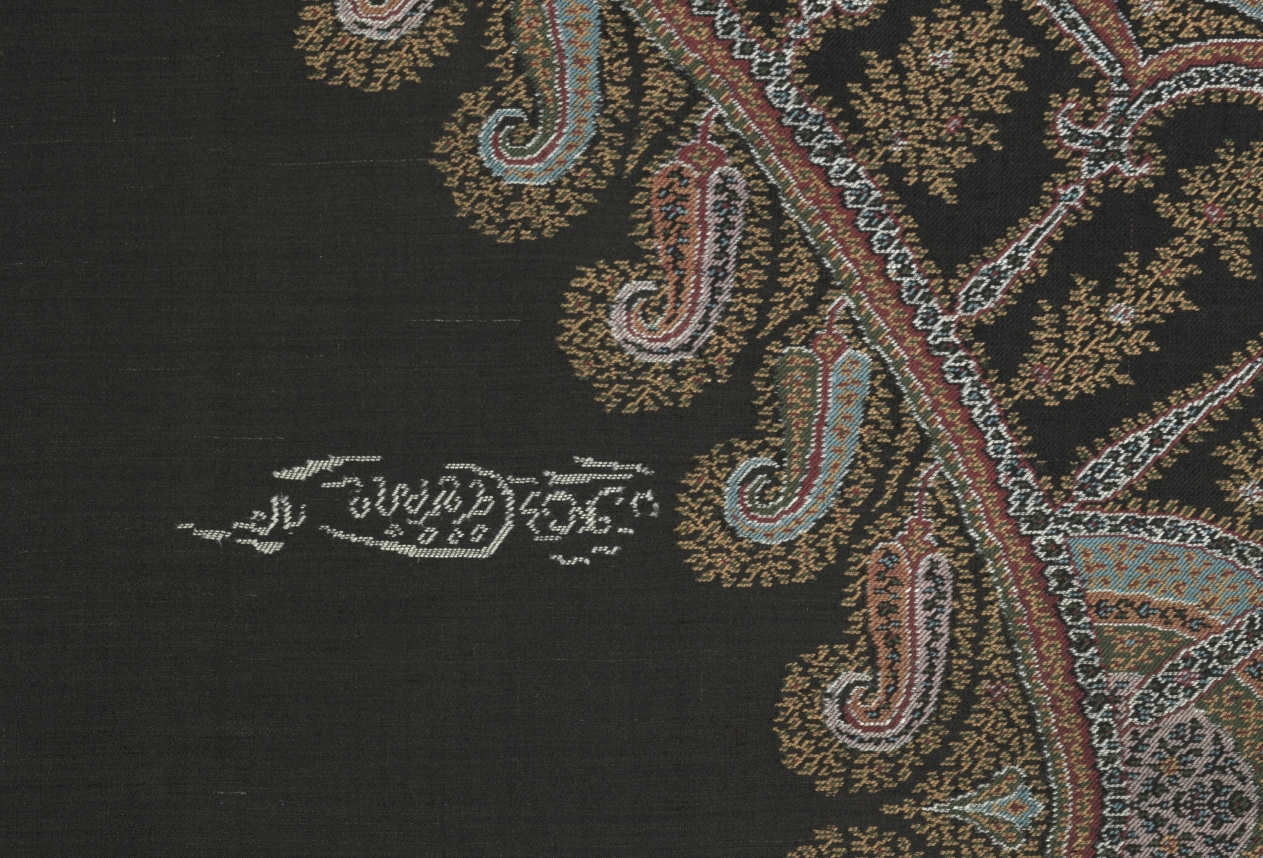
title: Long Shawl with Botehs, Black Center, and Lobed Arcades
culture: France, Paris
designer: Emile Frederic Herbert (French)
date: 1855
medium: supplemental weft pattern; silk?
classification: Textile